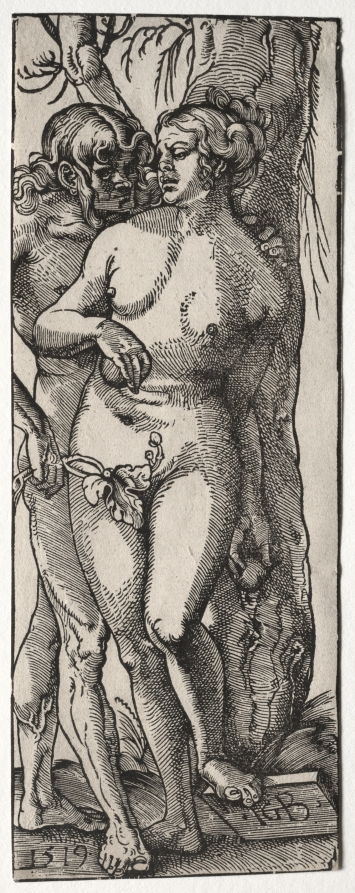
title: Adam and Eve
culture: Germany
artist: Hans Baldung (German, 1484/85–1545)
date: 1519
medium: woodcut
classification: Print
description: In Hans Baldung’s later rendition of Adam and Eve the reduction of setting—in which the Garden of Eden is reduced to a tree—brings the focus to the bodies of Adam and Eve and their physical interaction and desire. Baldung even eliminated the serpent, instead introducing a sinister element in the near-predatory Adam, cast in deep shadow as if emerging from the darkness. With such spare imagery overall, it is the audience, by looking, that is implicated in the first couple’s original sin and guilt.